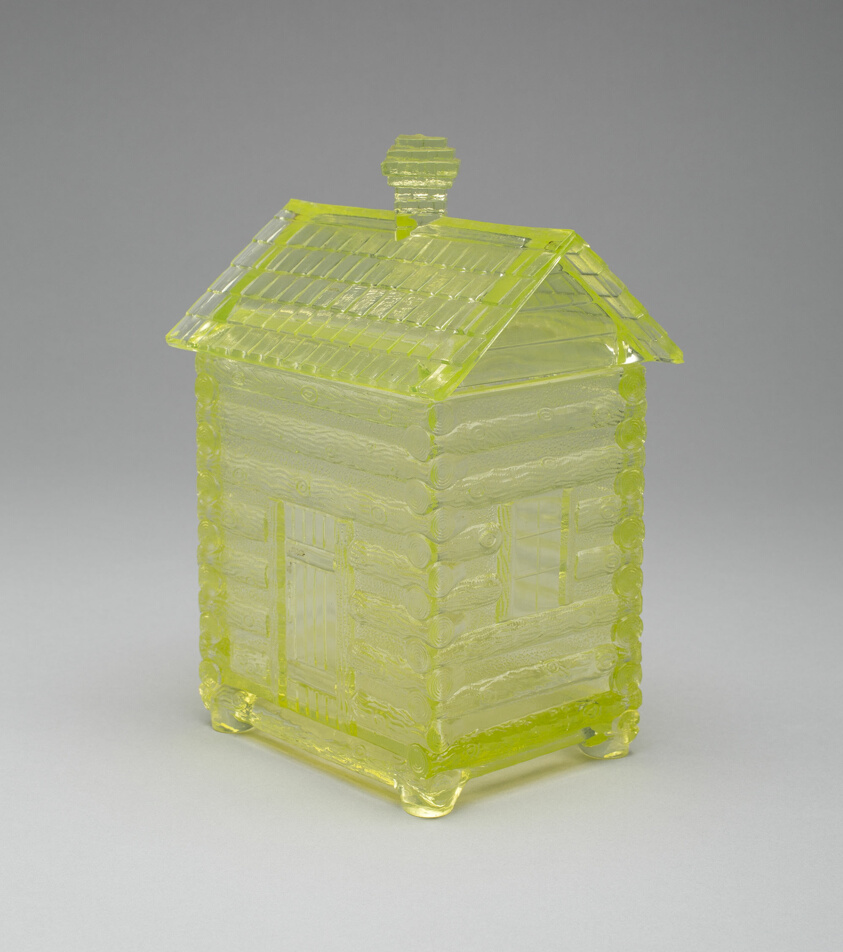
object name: Glass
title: "Log Cabin" pattern covered sugar bowl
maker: Central Glass Company; American, 1867–1896; Wheeling, West Virginia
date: c. 1875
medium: Pressed yellow glass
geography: Wheeling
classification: sugar bowl; glass; american decorative arts; american arts; decorative arts